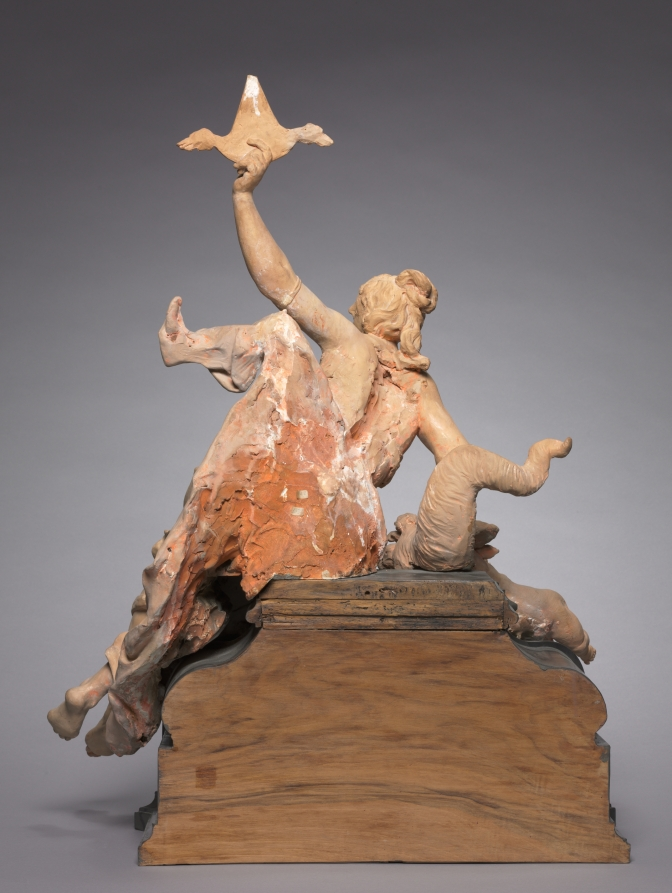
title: Abundance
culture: Austria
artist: attributed to Lorenzo Matielli (Austrian, c. 1688–1748)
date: c. 1730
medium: terracotta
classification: Sculpture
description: This work is probably a model for a garden statue that came from Castle Neuwartenburg near Vocklabruck. Castle Neuwartenburg was built from plans by Domenico Martinelli, with frescoes by Altomonte and sculpted decorations of the doorway and gardens by Lorenzo Matiellli (who also designed the door figures of the Cloisters at Melk and St. Michael's church in Vienna). The completion and dedication of the castle took place in 1732 with a personal visit by Emperor Karl VI. The statue was never executed, and the model remained in the castle.